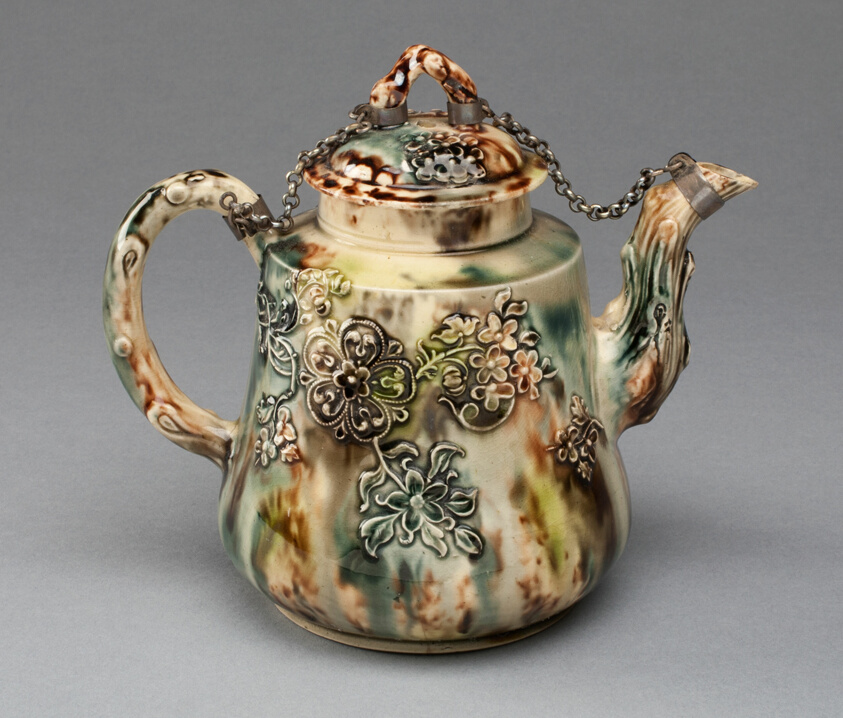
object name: Ceramics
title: Teapot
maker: Staffordshire, England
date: 1760/70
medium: Lead-glazed earthenware (creamware)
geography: Staffordshire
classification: teapot; ceramics; creamware; earthenware; european decorative arts; lead-glazed earthenware